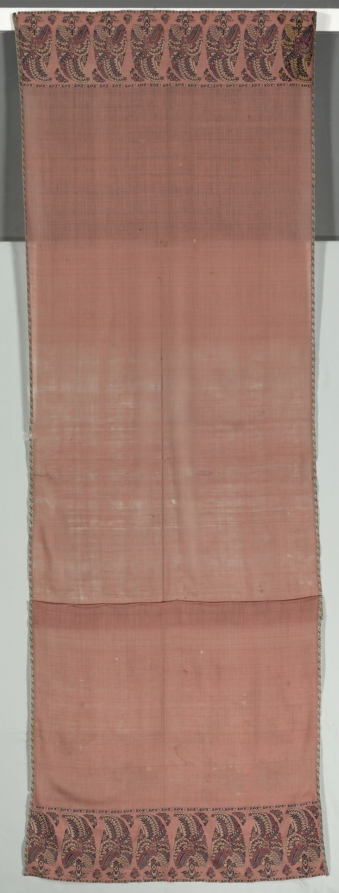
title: Apricot Long Shawl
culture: India, Kashmir, Afghan period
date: 1785–1800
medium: 2/2 twill tapestry weave, double interlocked; wool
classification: Textile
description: Artistic styles evolved with increasingly elaborate mosaic-like decoration during the 1800s to meet an insatiable European demand. Early shawls had plain fields with isolated plants in the end panels, which led to decorated side borders and vases of blossoming stems. Such flora was replaced by colorful, dense blossoms forming cone-shaped botehs, or paisleys, on trays. To this was added a gallery of small botehs and angular floral vines around a rich blue field with single botehs in the corners. Lightweight, supple, warm, and colorful, Kashmir shawls had no equal. Fine, soft goat-hair wool was woven in a 2/2 twill tapestry weave—the equivalent of painting with colored weft threads. Imitations woven in Paisley, Scotland, prompted the popular term paisley.